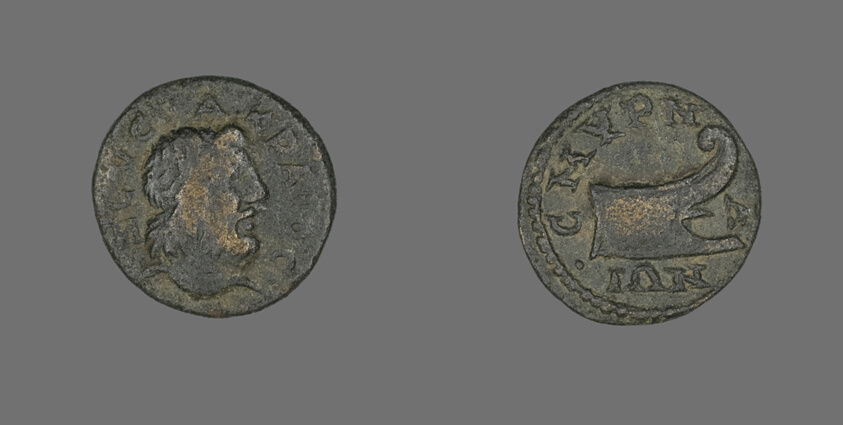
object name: Coin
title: Coin Depicting the God Zeus Akraios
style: roman (ancient, style or period)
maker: Roman, minted in Smyrna, Ionia (now Izmir, Turkey)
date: 138-192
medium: Bronze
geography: Roman Empire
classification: coin; ancient art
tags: gods (deities), zeus, ships